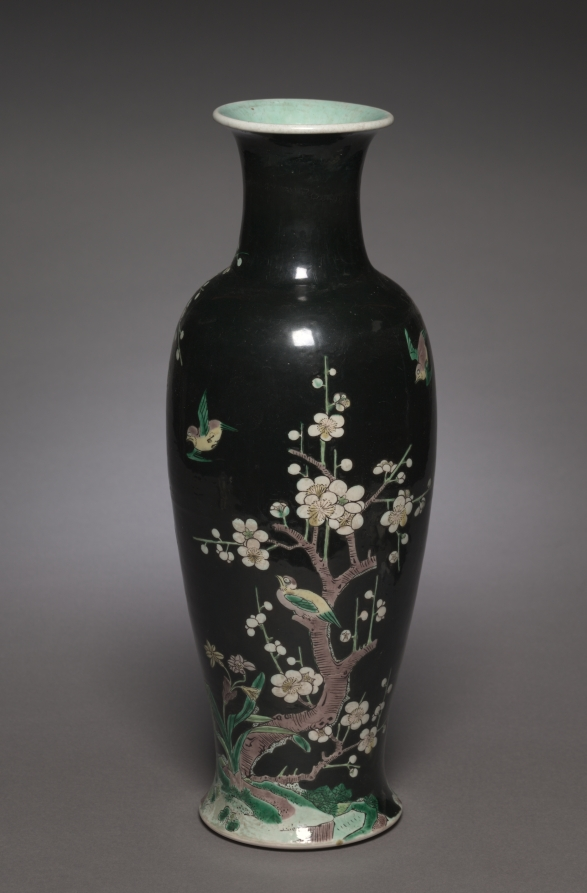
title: Baluster Vase with Blossoming Cherry Tree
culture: China, Qing dynasty (1644-1911), Kangxi reign (1662-1722)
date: 1714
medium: porcelain with polychrome enamel decoration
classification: Ceramic